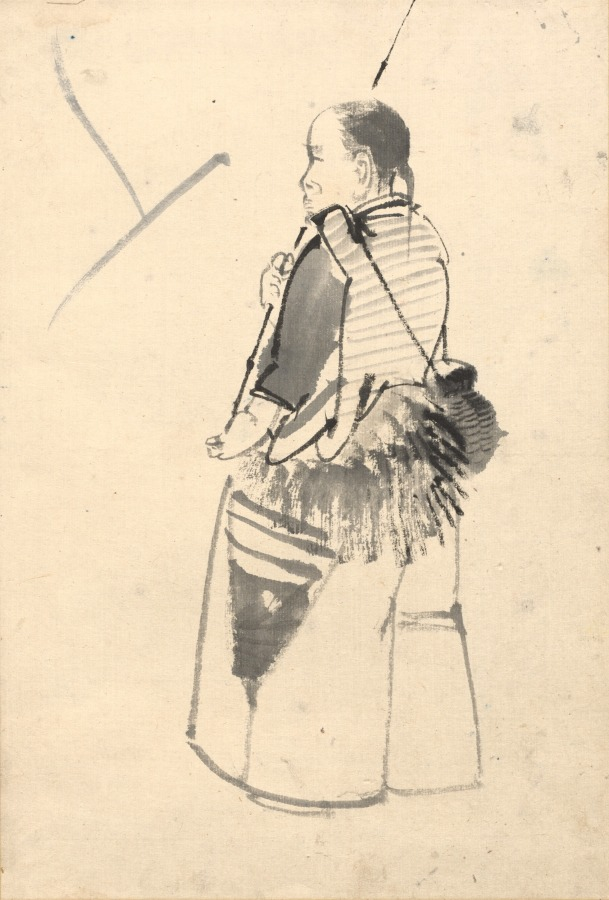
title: Dancer in a Fisherman's Costume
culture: Japan, Meiji period (1868–1912)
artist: attributed to Kono Bairei (Japanese, 1844–1895)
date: c. 1880–95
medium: ink on paper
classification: Drawing